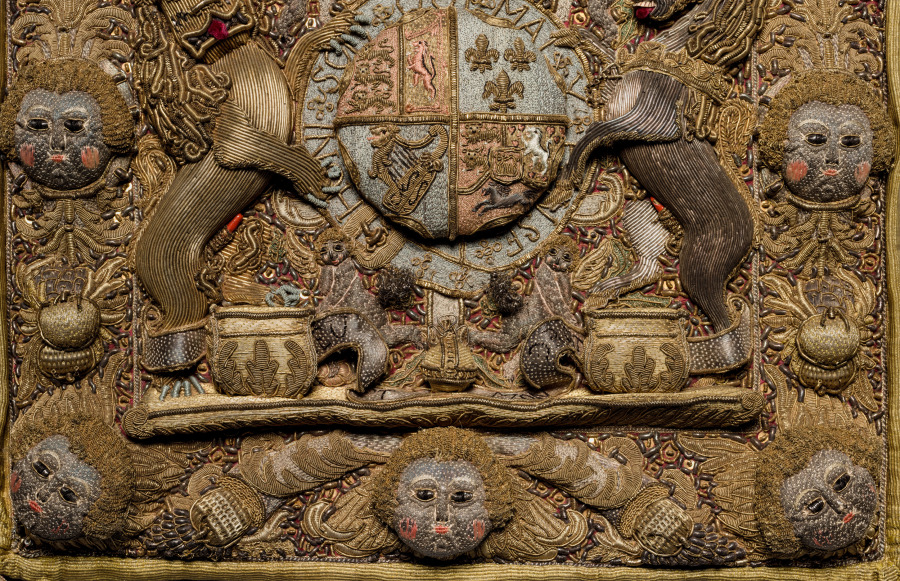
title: Lord Chancellor's Burse (Purse) with Royal Cypher and Coat of Arms of George III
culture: England, 18th century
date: 1700s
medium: red silk velvet, silk embroidery, goldwork, pearls, black beads, sequins, pendant tassels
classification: Velvet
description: A richly decorated burse (purse) to hold the monarch's Great Seal of the Realm has a traditional role in the opening of parliament. The safekeeping of the seal was the responsibility of the Keeper of the Great Seal, an office later incorporated into the role of Lord Chancellor. Because the Great Seal was attached to all major documents of state, it was the ultimate symbol of royal authority. The use of a special burse to hold the seal can be traced back to the end of the 13th century. By the end of the 16th century, the burse had evolved into the highly decorated, professional work of embroidery seen in this object. It includes the lion and unicorn surrounding the royal crest and is made from crimson velvet. Burses were replaced annually; it being a "perk" of office that the Lord Chancellor and Keeper of the Great Seal was allowed to keep the fragments of the old seal and accompanying burse. Portraits of Lord Chancellors, from the Tudor period onward, depict them with their burse. Cleveland’s collection includes one such portrait by American artist Gilbert Stuart (1755–1828) of Irish Lord Chancellor John FitzGibbon, 1st Earl of Clare (1748–1802) who was Lord Chancellor from 1789 to 1802. Baron FitzGibbon’s portrait (1919.910) is on view in gallery 204.